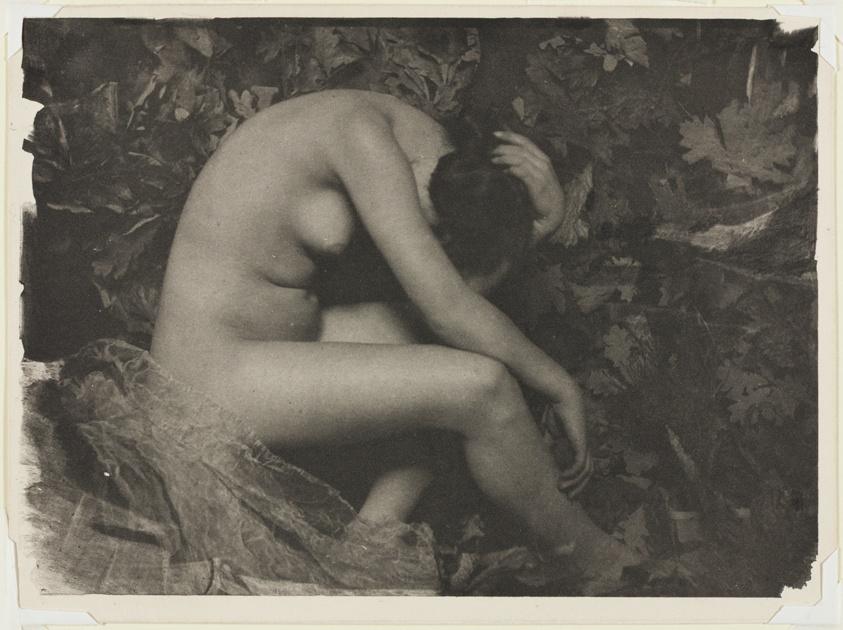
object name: Photograph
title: La Cigale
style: Pictorialism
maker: Frank Eugene (American, 1865–1936)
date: 1898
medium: Photogravure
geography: United States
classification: platinum print; photographic process; photography; photograph